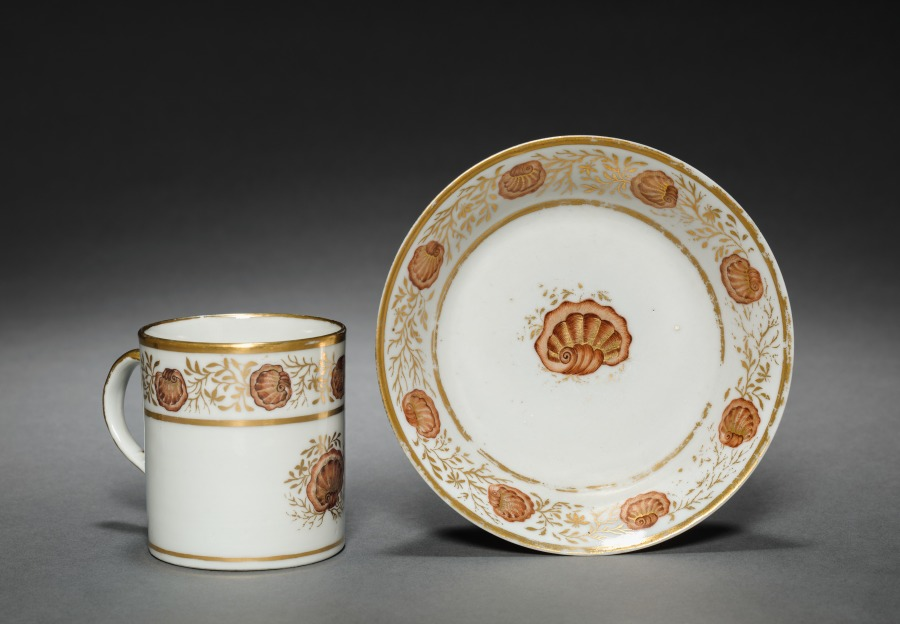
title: Cup from Oliver Wolcott, Jr. Tea Service (5 of 6)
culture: Chinese Export porcelain, late 18th-early 19th century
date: 1785–1805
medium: porcelain, sepia enamel, gold leaf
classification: Ceramic